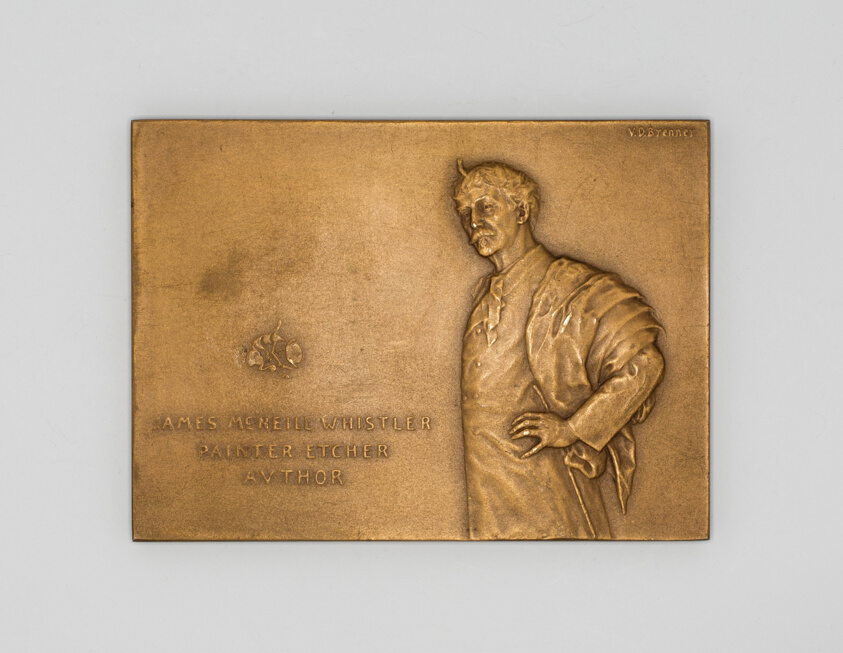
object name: Metalwork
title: Two Medals Commemorating James McNeill Whistler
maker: Victor David Brenner (American, born Šiauliai, Russian Empire, now Lithuania, 1871–1924)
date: 1890–1908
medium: Bronze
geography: United States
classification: medal; american arts; decorative arts